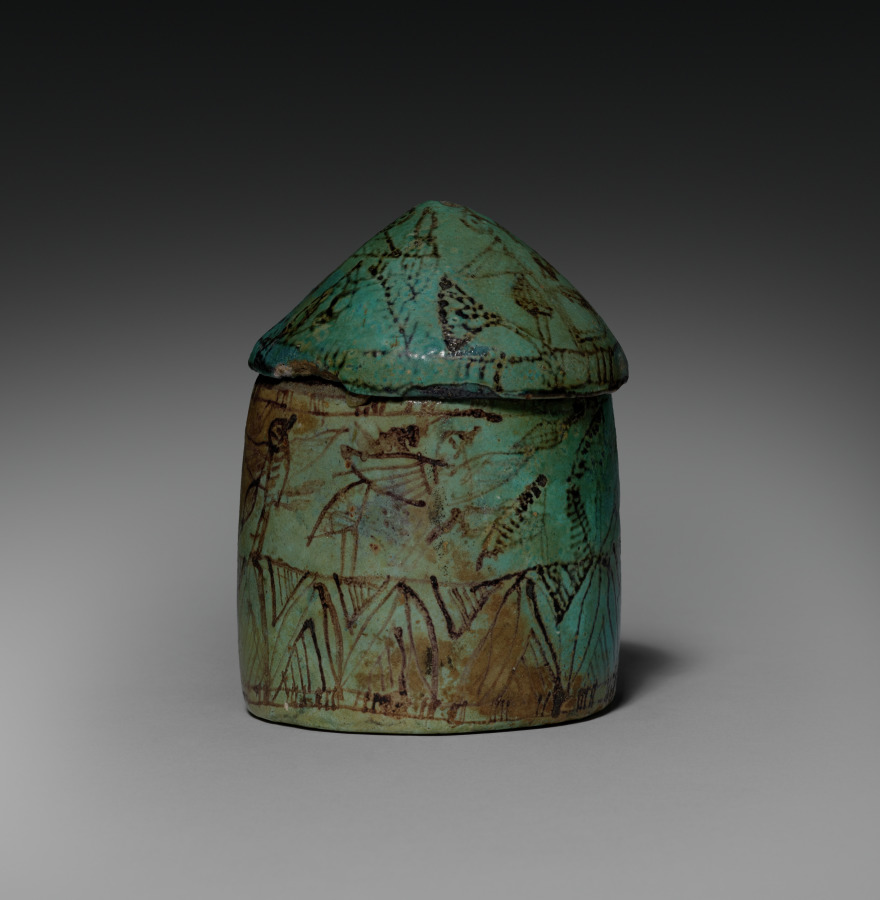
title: Pyxis with Lid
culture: Egypt, Middle Kingdom (2040–1648 BCE)–New Kingdom (1540–1069 BCE)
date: c. 1901–1525 BCE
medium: turquoise faience with black decoration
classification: Vessels